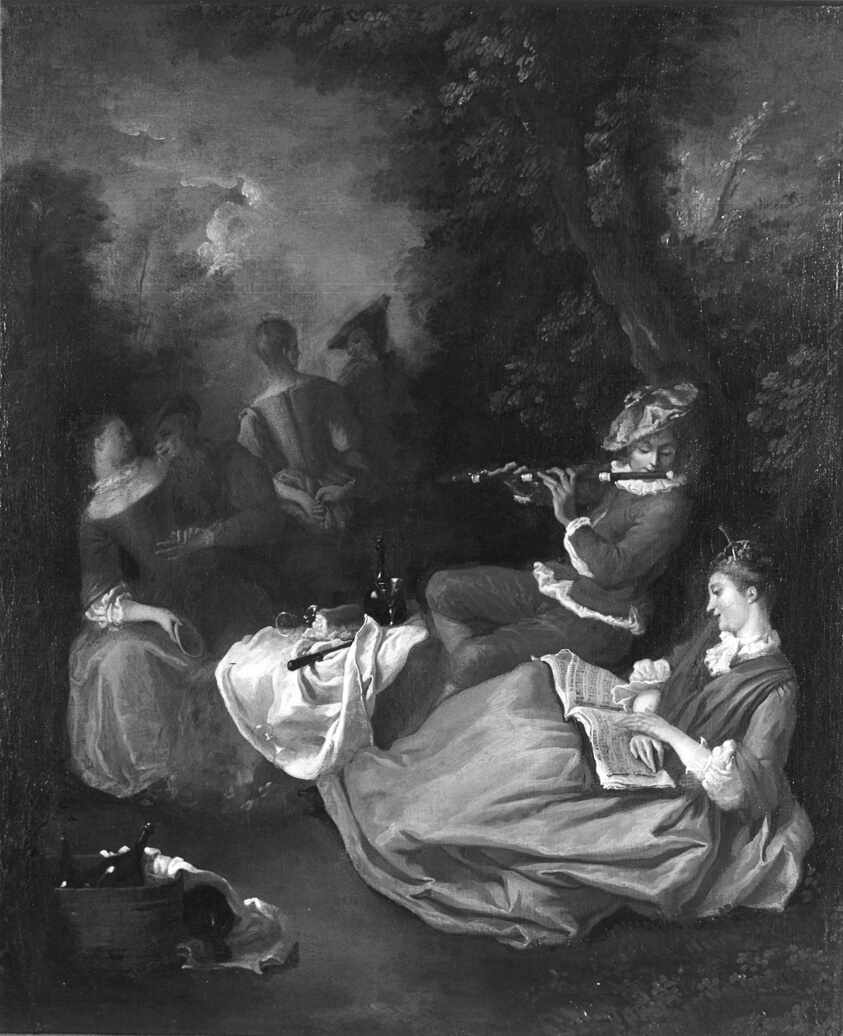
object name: Painting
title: Fête Champêtre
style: 18th Century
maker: Artist unknown (French, active 18th century)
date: 1725/1750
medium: Oil on canvas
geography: France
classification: oil on canvas; oil paintings (visual works); paint; painting; european painting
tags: men, forests, landscape, love, music, musical instruments, Picnic, trees, wine, women